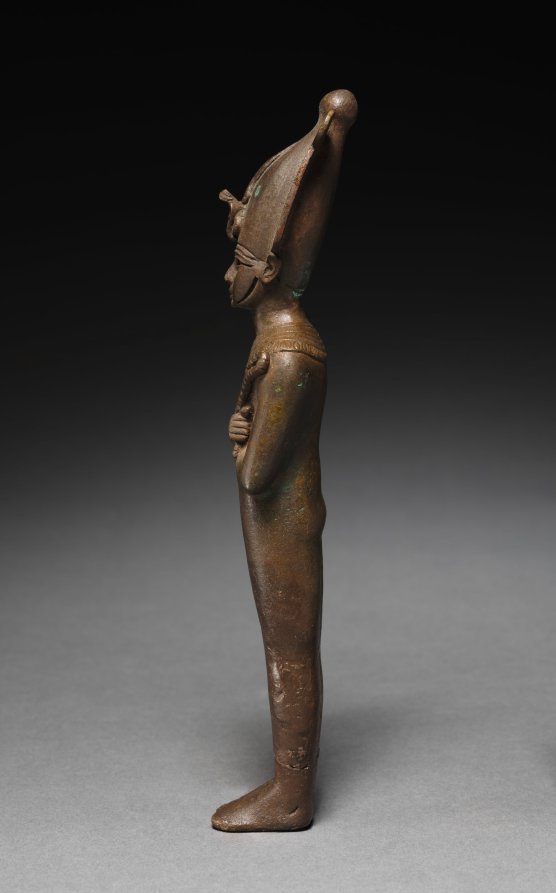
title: Statuette of Osiris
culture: Egypt, Late period (715–332 BCE), Dynasty 26 or later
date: 664–525 BCE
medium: bronze, hollow cast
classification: Sculpture